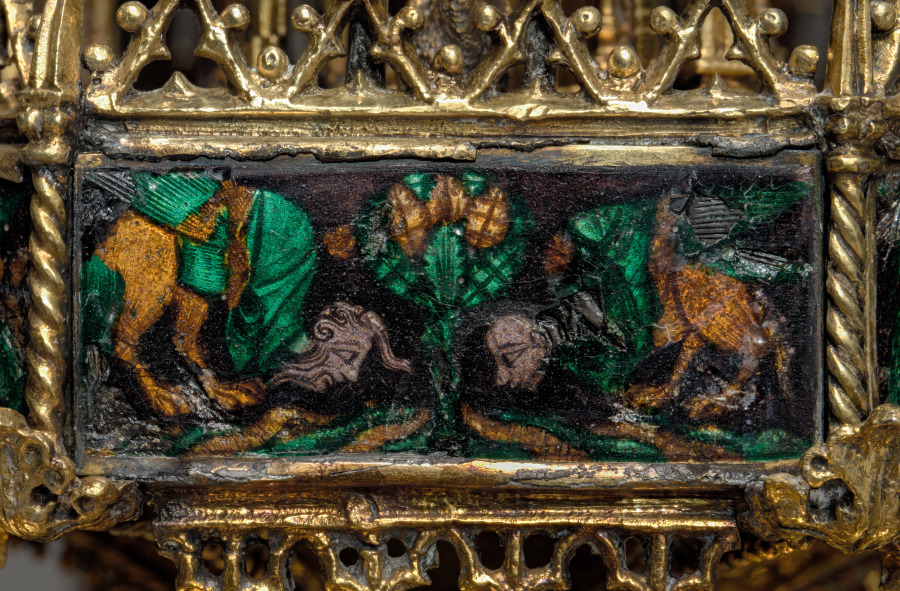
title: Table Fountain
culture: France, Paris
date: c. 1320–40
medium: gilt-silver and translucent enamels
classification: Metalwork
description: Conceptually and stylistically, this object is beyond all else a piece of Gothic architecture in miniature with vaults, pinnacles, columns, and traceried arches. Though the artist who created it is unknown, he was unquestionably inspired by the great Gothic buildings of his time. The table fountain is a three-tiered assembly combining cast elements with bent sheets of gilt-silver. To these have been attached a series of enamel plaques representing grotesque figures, some of which play musical instruments. Water wheels and bells were added to capture motion and sound. The rich detail, precious materials, and involved ornamentation of this deluxe object suggest it would have been expensive to produce and highly treasured by its original owner, someone of high status, and would have been deployed as an object of spectacle. This is the most complete example of its type known to survive from the Middle Ages. Medieval inventories reveal that small fountains like this, often taking various forms, and generally made from precious metals, once existed in large numbers, thus making the Cleveland table fountain an extremely rare object.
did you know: This fountain with its minute architectural details and finely made enamel plaques displayed the wealth and refinement of the owner as it entertained his guests. Imagine hearing the ringing of the tiny bells when this fountain was in use.